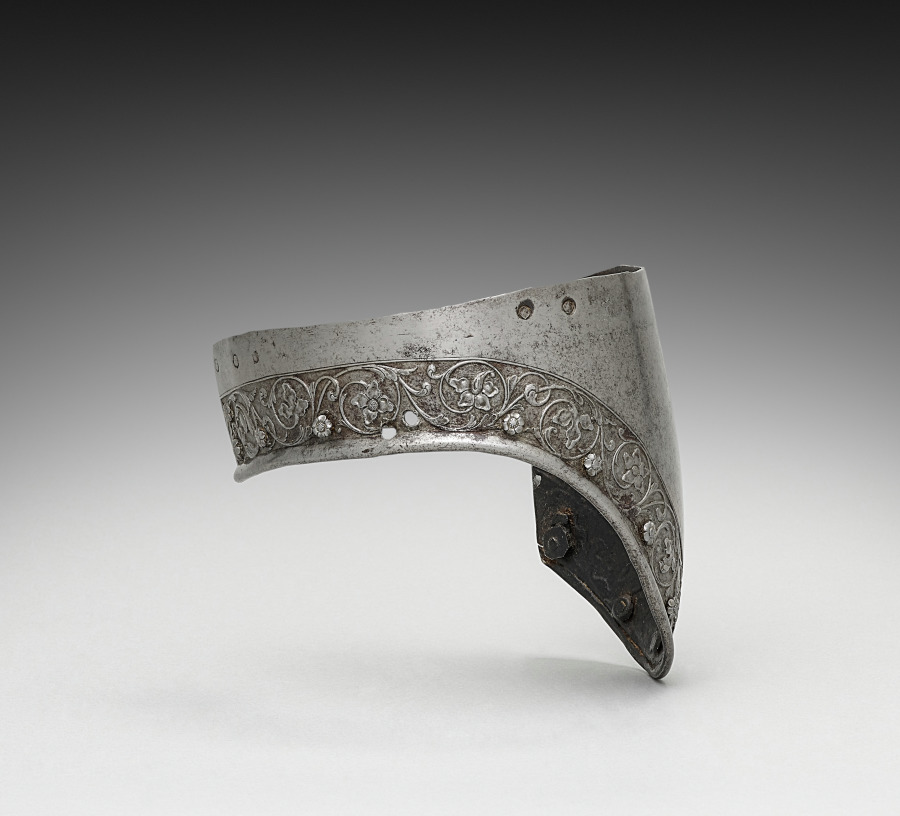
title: Upper Arm Canon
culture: Italy, Milanese Style, probably 19th century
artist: attributed to Negroli Workshop (Italian, c. 1500–1561)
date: 1800s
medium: steel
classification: Arms and Armor